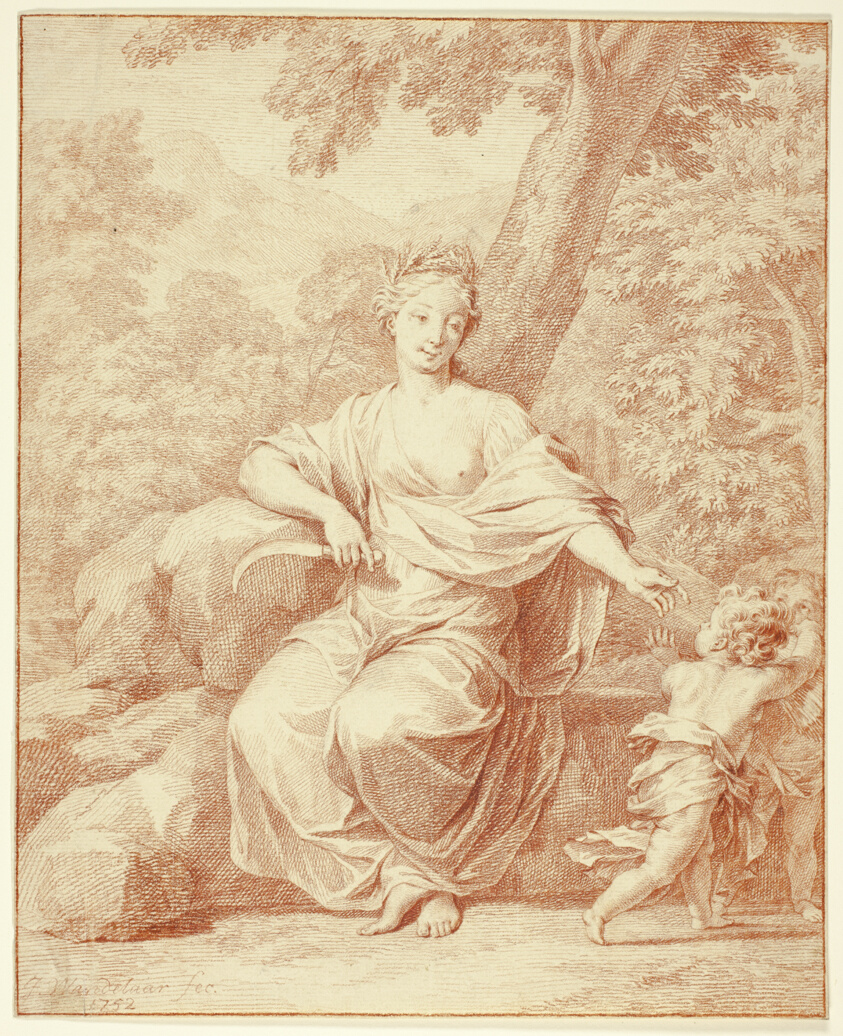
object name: Drawing and Watercolor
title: Ceres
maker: Jan Wandelaar (Dutch, 1690-1759)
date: 1752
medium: Red chalk on cream laid paper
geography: Holland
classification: chalk; drawings (visual works); prints and drawing